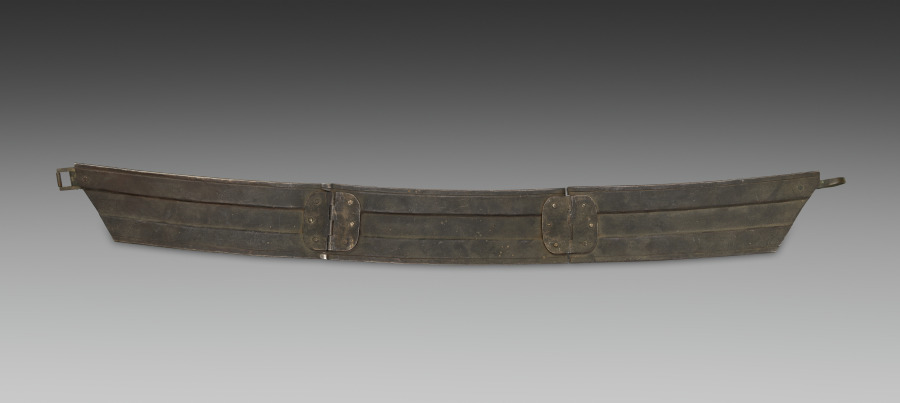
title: Armored Horse's Rein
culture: Germany, 19th century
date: 1801–1900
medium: steel with black paint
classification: Arms and Armor